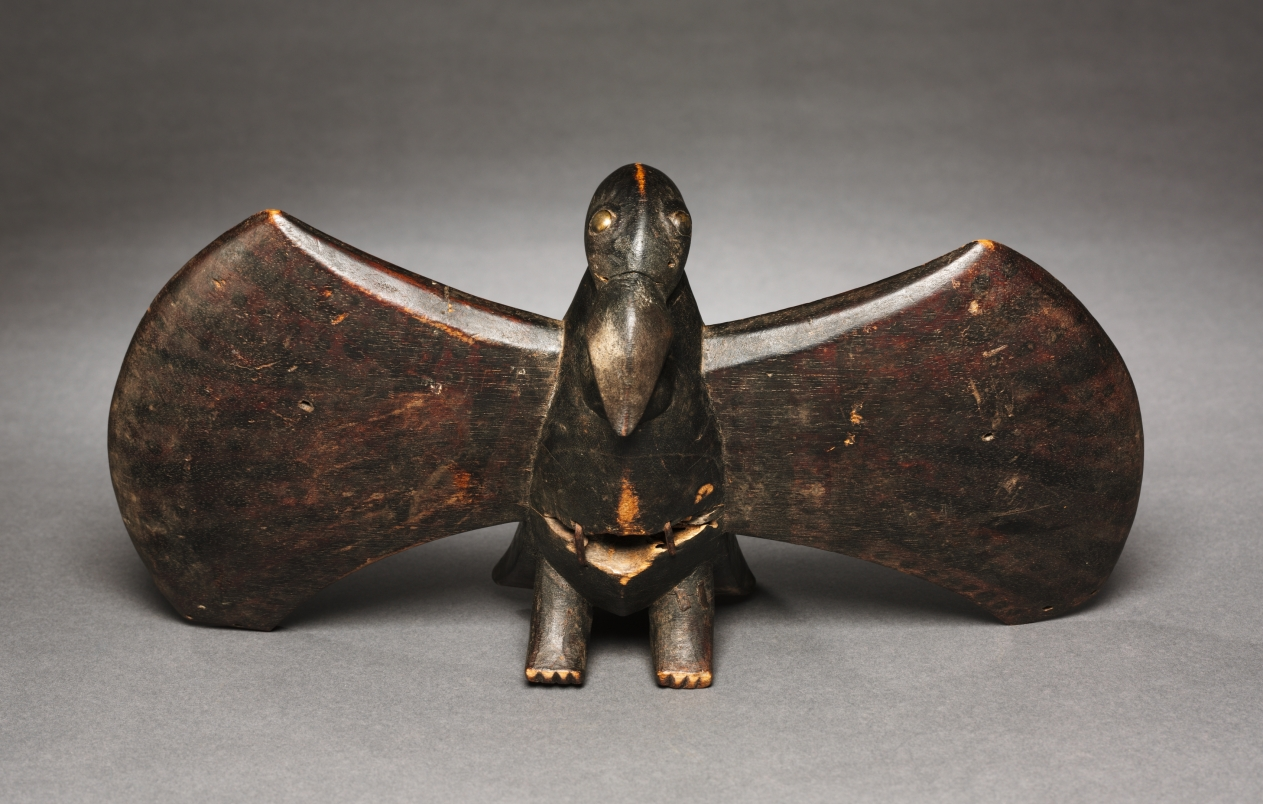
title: Bird Standard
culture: Africa, West Africa, Côte d'Ivoire, Senufo-style carver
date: early to mid-1900s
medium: Wood and upholstery studs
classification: Sculpture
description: An eagle depicted in flight originally surmounting a long staff, the bird standard is offered to the winner of a hoeing contest between young men. The competition is not only meant to promote social cohesion and solidarity, it also serves to encourage fertility. Honoring the endurance of a victorious farmer, such a bird standard is also used as a display sculpture during the funeral of a former champion or a member of his courtyard or family unit.